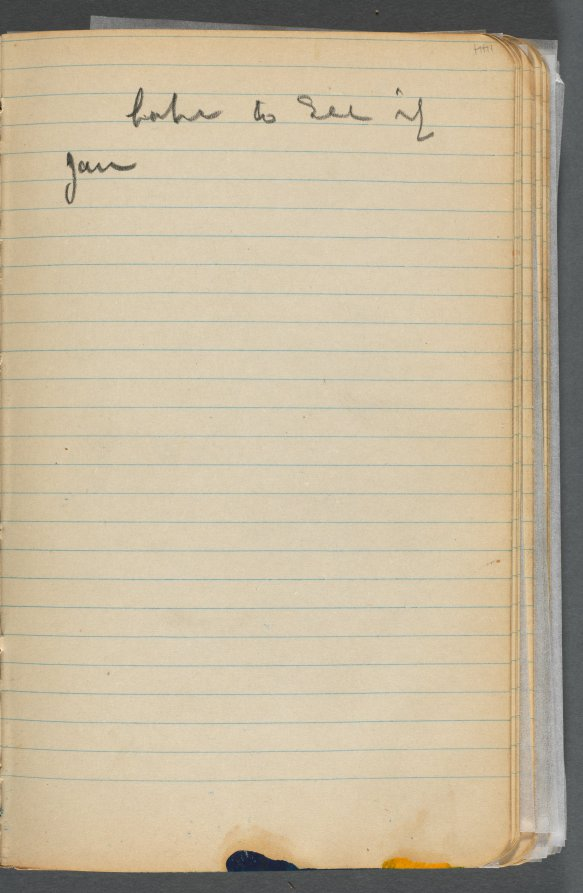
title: Sketchbook, page 144: Notes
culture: America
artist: Maurice Prendergast (American, born Newfoundland [now Canada], 1858–1924)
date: 1905–10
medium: graphite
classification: Bound Volume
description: This sketchbook contains 69 pages of drawings, a diary largely devoted to the state of the artist's health, and a three-page discourse on the nature of genius and ideas.